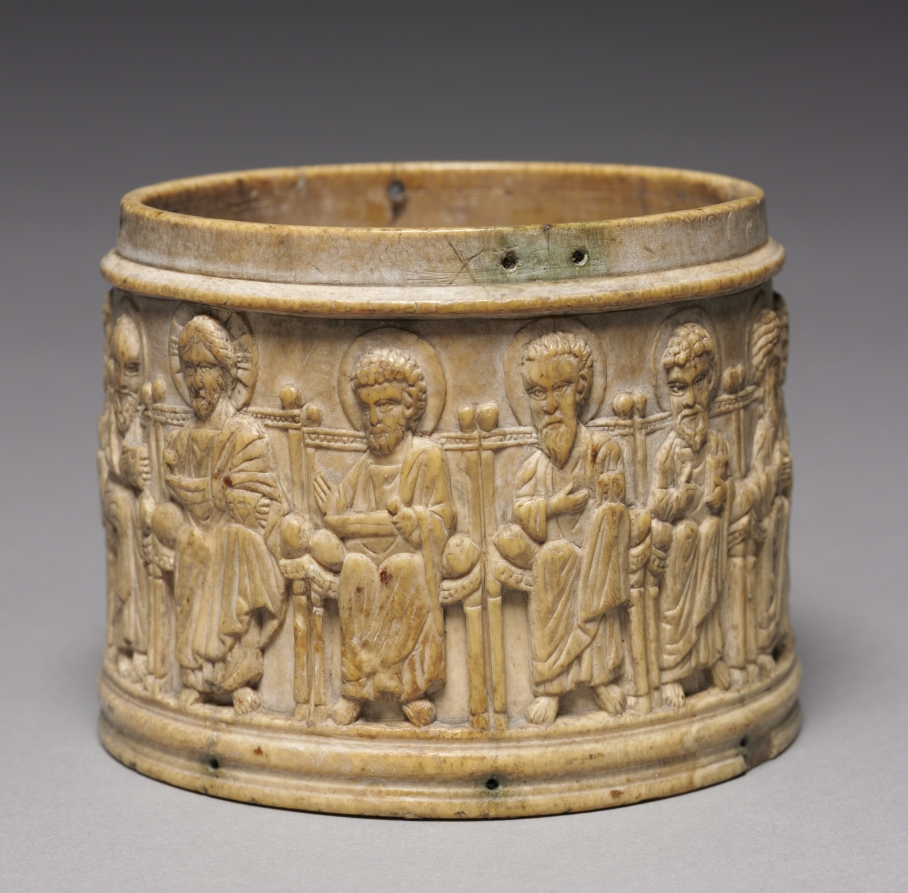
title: The "Apostles" Pyx (Box)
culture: Byzantium, Constantinople, middle Byzantine period, 10th-11th century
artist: probably by Triptych Group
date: c. 980–1010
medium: ivory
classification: Ivory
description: This pyx shows Christ as Pantokrator (Ruler of the World), the Apostles, and the Virgin as a continuous frieze of figures seated in high-backed chairs with cushions. The tapered lip of the body of the pyx was intended to dovetail into the missing lid. Because of its style, the box is thought to be from a workshop of ivory carvers called "The Triptych Group" active in Constantinople between about 950 and 1010. This is the only known pyx to survive from the Middle Byzantine period (about ad 843-1204).